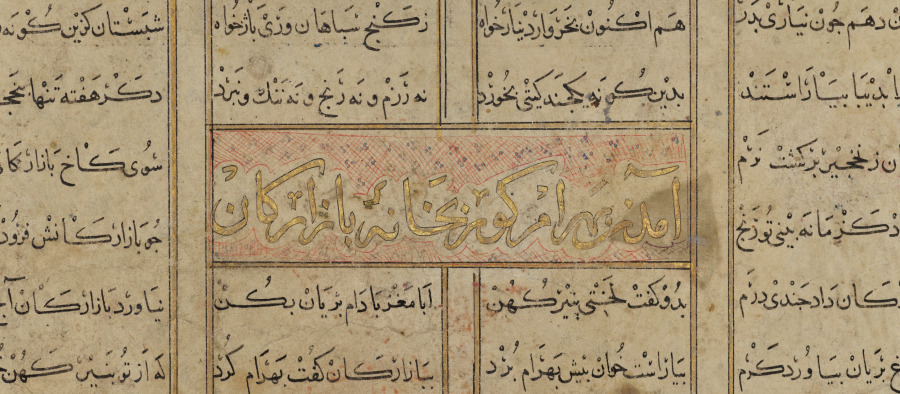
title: Bahram Gur Arrives at the House of a Merchant, text page (recto), from a Shahnama (Book of Kings) of Firdausi (940–1019 or 1025), known as the Great Mongol Shahnama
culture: Iran, Tabriz, Ilkhanid period (1256-1353)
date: 1330–35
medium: opaque watercolor, ink, and gold on paper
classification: Manuscript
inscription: Script: Naskh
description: In this intense painting, Bahram Gur plunges his sword into the breast of a dragon. A favorite character from Iran's pre-Islamic history, Bahram Gur (reigned 420–38 CE) was a popular ruler of the Sasanian dynasty and a great hunter. He took the name "Gur," meaning onager (a wild ass), because it was his preferred game, although he also excelled at killing dragons. As evidenced by this illustration's rock formations, tree trunk, and dragon, Iranian painting in the Mongol period borrowed numerous stylistic and spatial elements from Chinese models. With the surging landscape and writhing dragon rendered with equal energy, this is a picture of extraordinary unity and concentration.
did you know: The Shahnama, a poem written by Firdawsi around 1010, tells the history of ancient Iran.